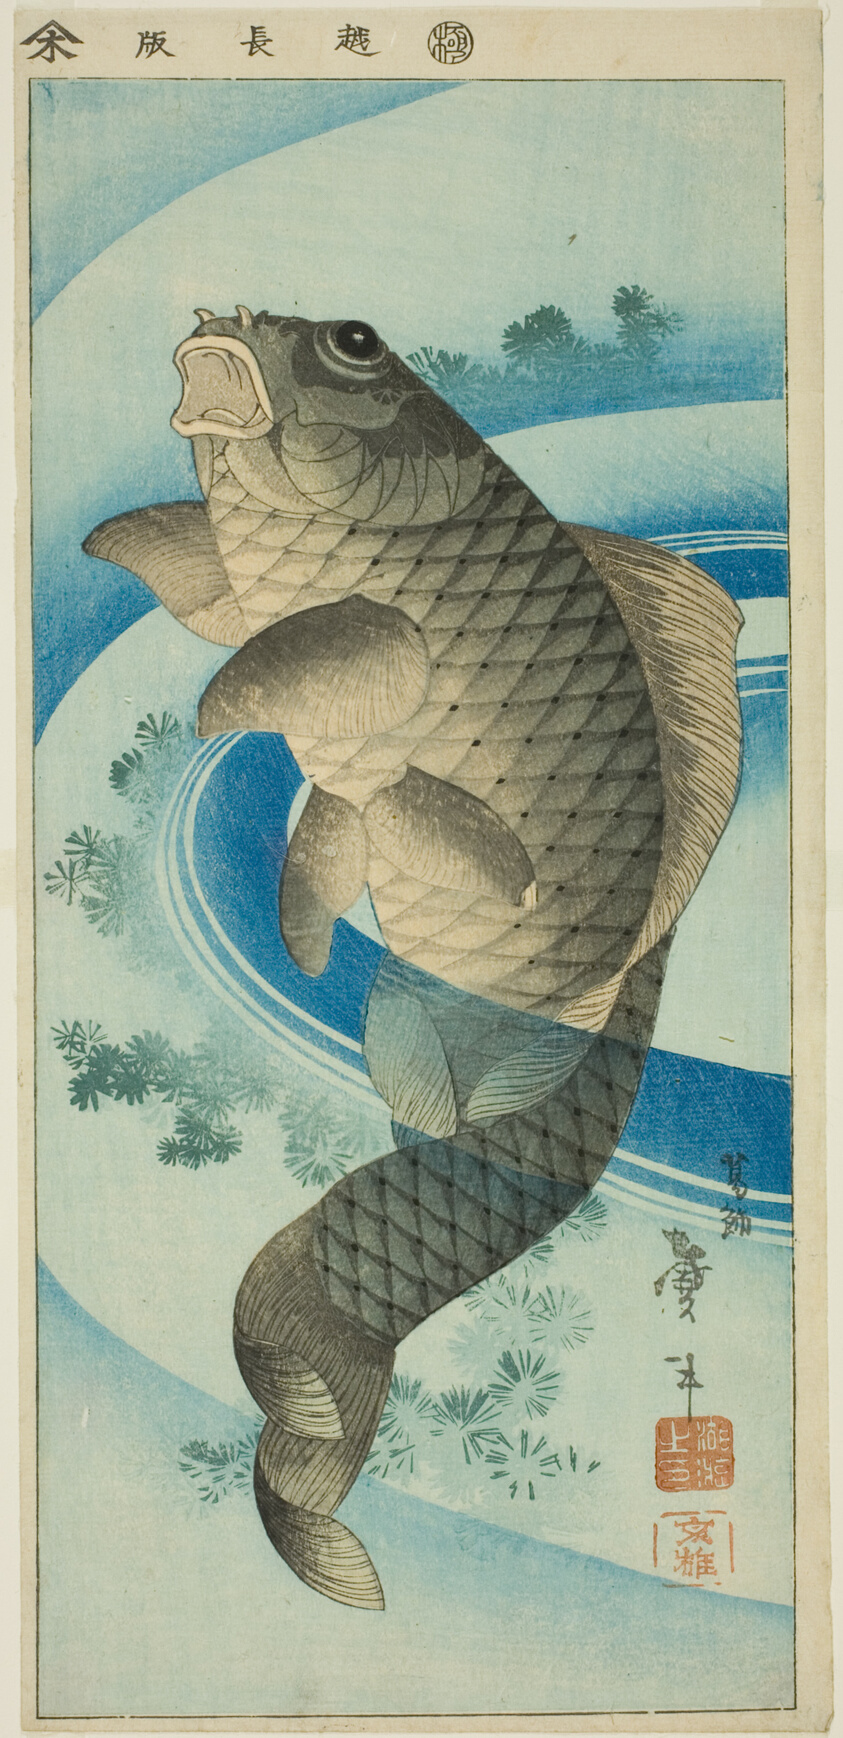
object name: Print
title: Carp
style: Japanese (culture or style)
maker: Katsushika Taito II (Japanese, active c. 1810-53)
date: c. 1830/44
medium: Color woodblock print; section of harimaze sheet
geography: Japan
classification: woodblock print; print; asian art